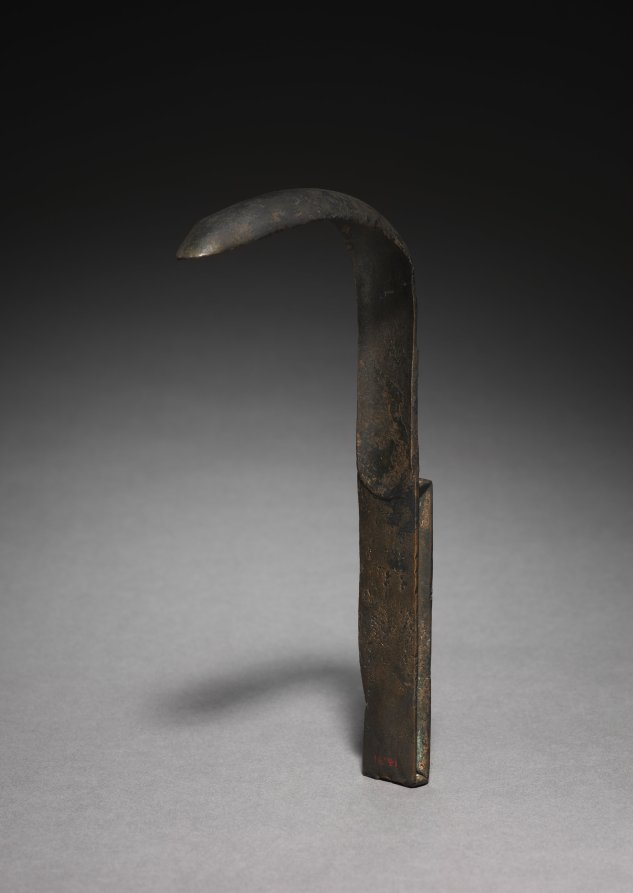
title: Strigil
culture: Italy, Roman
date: 324–476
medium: bronze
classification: Metalwork